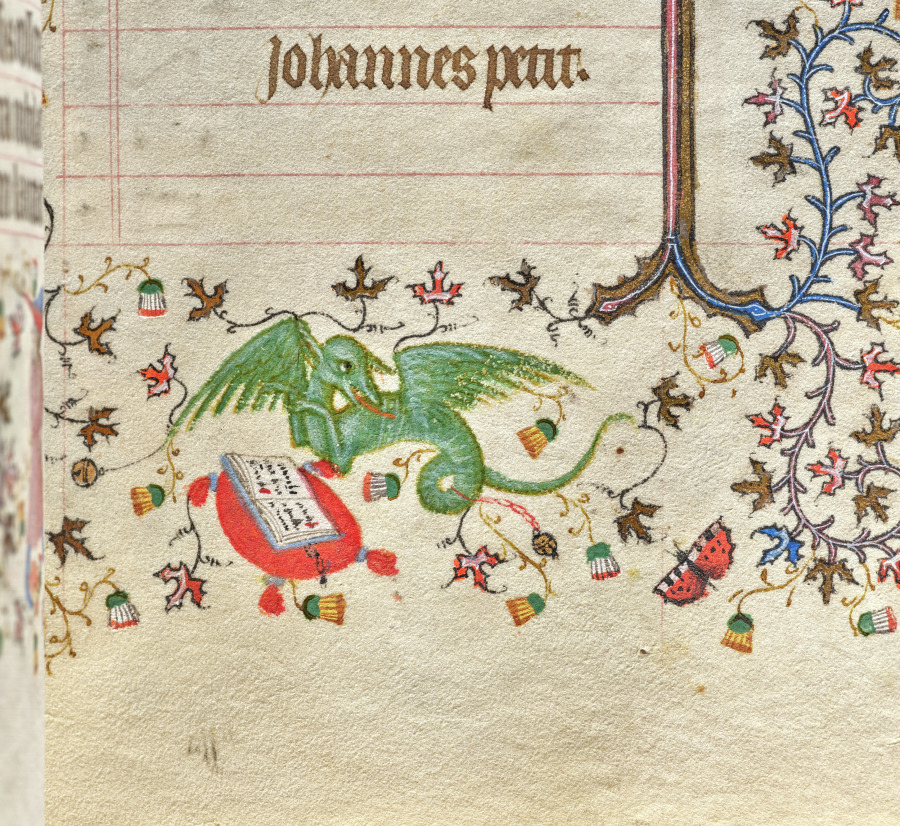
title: Hours of Charles the Noble, King of Navarre (1361-1425): fol. 105r, Text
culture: France, Paris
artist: Master of the Brussels Initials and Associates (French)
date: c. 1405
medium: ink, tempera, and gold on vellum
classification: Bound Volume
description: This precious volume was obviously highly prized by its owner, the French-born King of Navarre, who had his coat of arms painted on no less than twenty folios. Rather than directly commissioning this manuscript from a specific workshop, it seems that Charles the Noble acquired his book of hours -- perhaps ready-made for the luxury market -- while on a trip to Paris in 1404-05. A collaborative effort, six painting styles are evidenced within the pages of this codex, those of two Italians, two Frenchmen, and two Netherlanders. The painter who was responsible for the planning and decoration of the book, and who produced seventeen of the large miniatures, was a Bolognese artist known as the Master of the Brussels Initials. His principal assistant, responsible for most of the borders, was a Florentine who signed his name "Zecho" da Firenze on folio 208 verso.